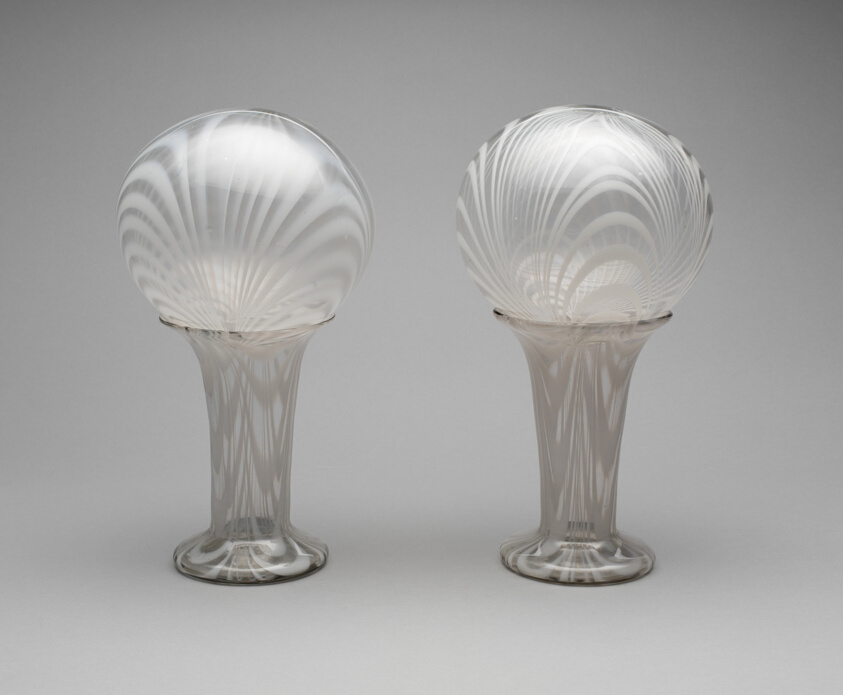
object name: Glass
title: Pair of Witch Balls with Vases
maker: Artist unknown (American, 19th century); Possibly southern New Jersey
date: 1850–75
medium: Glass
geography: United States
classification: household accessory; glass; american decorative arts; american arts; decorative arts